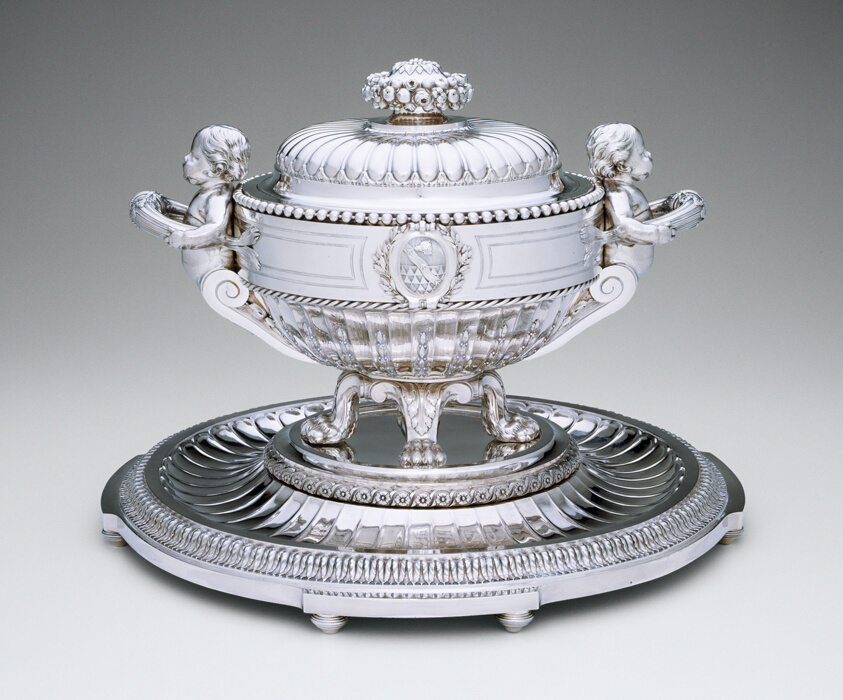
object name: Metalwork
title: Tureen and Stand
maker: Marked as by Jean-Françoise Dapcher; French, 1721–1780; Attributed to François-Thomas Germain; French, 1726–1791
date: 1773/74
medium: Silver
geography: France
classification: silver; metalwork; european decorative arts